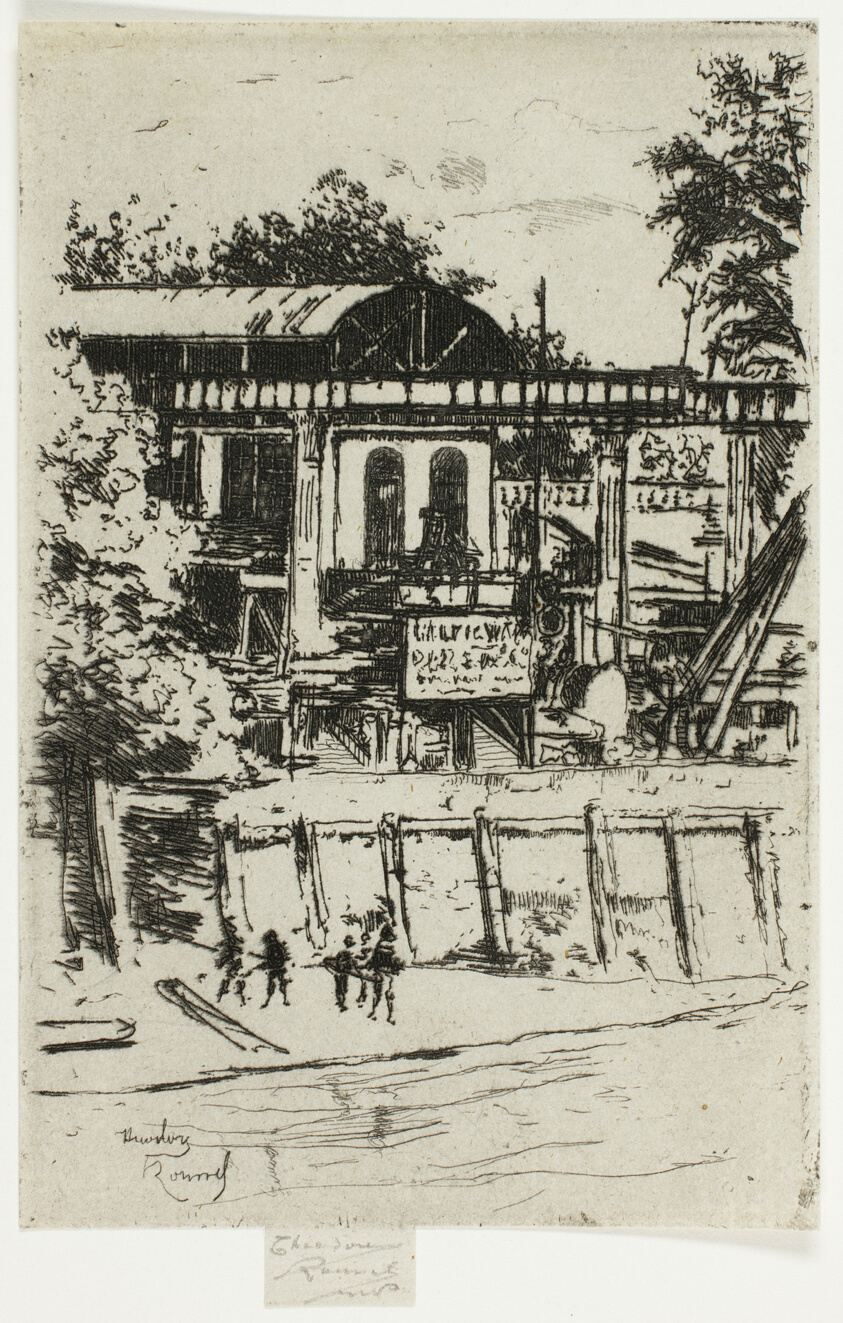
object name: Print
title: The Saw Mill, Putney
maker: Theodore Roussel (French, worked in England, 1847-1926)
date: 1888–89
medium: Etching in black on ivory laid paper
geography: England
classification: etching; paper; print; prints and drawing